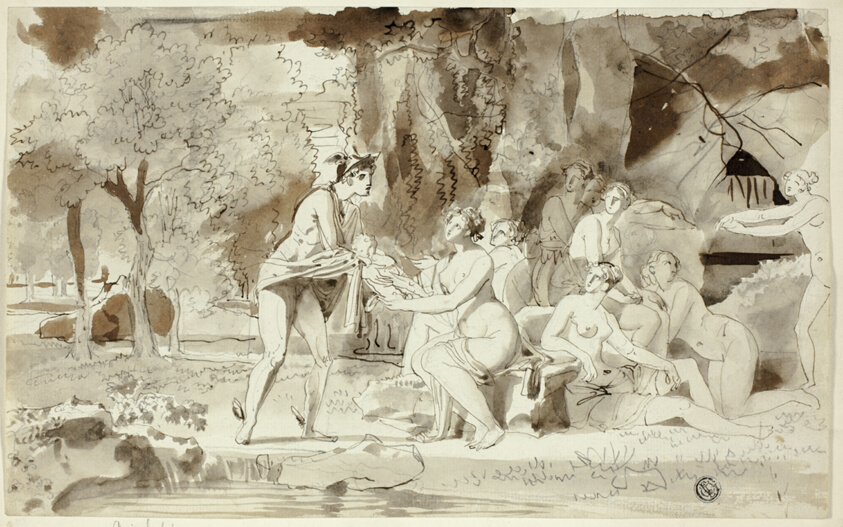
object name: Drawing and Watercolor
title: Mercury Bringing Bacchus to be Raised by the Nymphs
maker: Juan Cristobal (Spanish, active 1584-1594)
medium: Pen and brown ink, and brush and brown wash, with graphite, on ivory laid paper, tipped on ivory wove paper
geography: Spain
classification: pen and ink drawings; drawings (visual works); prints and drawing